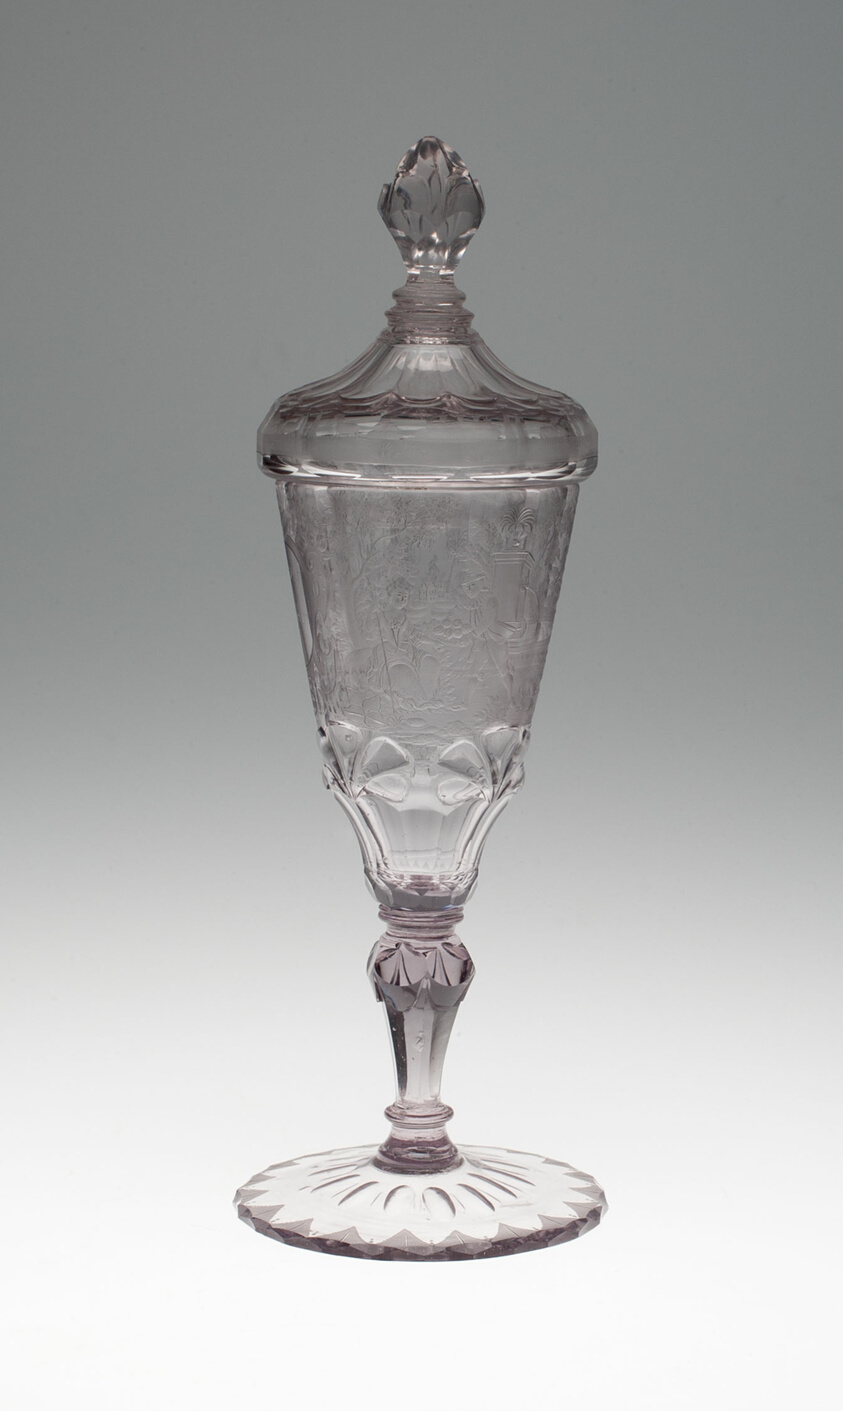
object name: Glass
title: Goblet with Cover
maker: Silesia; Attributed to Christopher Gottfried Schneider (German, early 18th century)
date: c. 1750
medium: Glass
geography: Silesia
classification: drinking vessel; glass; european decorative arts